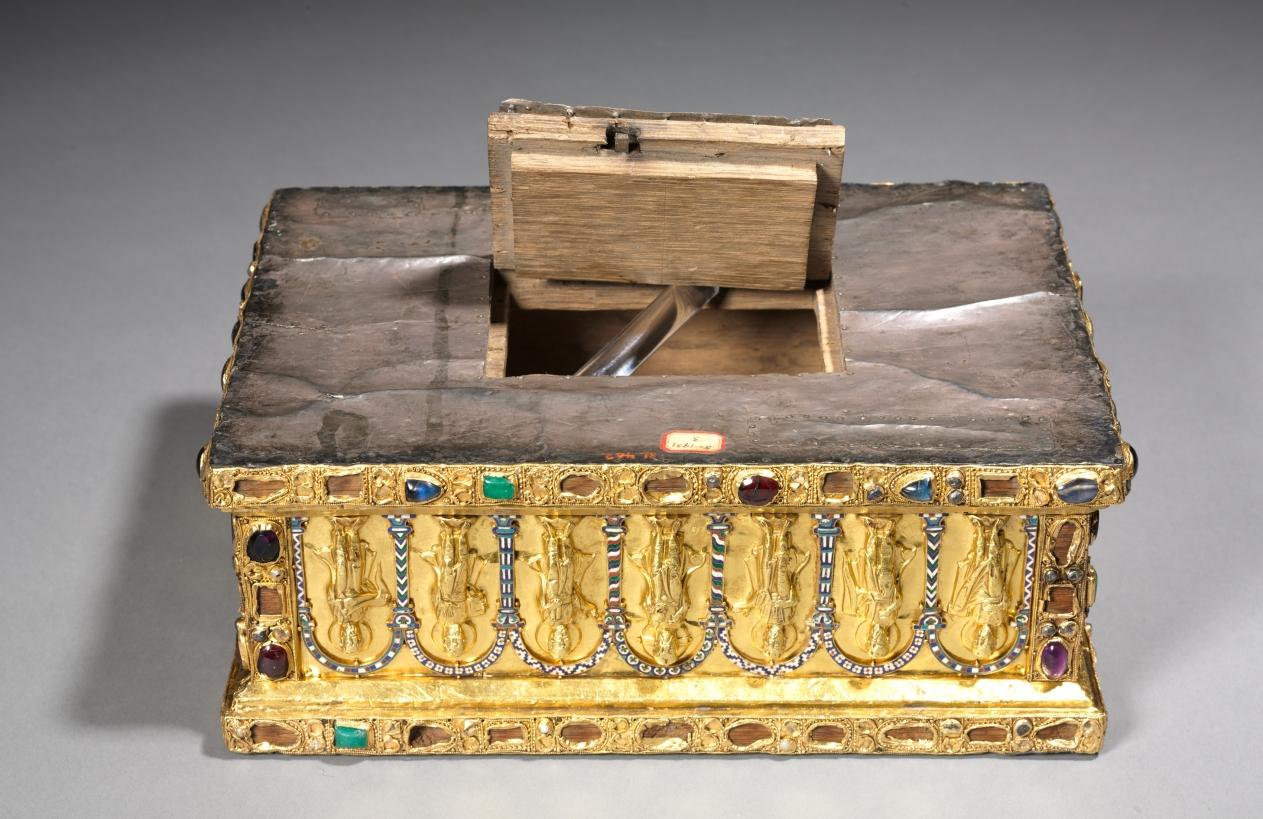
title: Portable Altar of Countess Gertrude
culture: Germany, Lower Saxony?, Romanesque period, 11th century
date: c. 1045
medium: gold, cloisonné enamel, porphyry, gems, pearls, niello, wood core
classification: Metalwork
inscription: GERDRVDIS XPO FELIX VT | VIVAT IN IPSO OBTVLIT HVNC LAPIDEM GEMMIS | AVROQ NITENTEM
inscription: SIGISMVNDVS, CONSTANTIVS, SANCTA CRVX, SCA ELENA, SCA ADALHEIT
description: Commissioned by Countess Gertrude of Brunswick, this portable altar is one of the Guelph Treasure’s earliest and most sumptuous objects. The choice of white-speckled porphyry as the altar stone signals Gertrude’s worldly aspirations; an imperial color since classical antiquity, porphyry was only used by the imperial family. Historical figures of royal and imperial rank are depicted with Christ, the Virgin, apostles, and archangels along the altar’s sides, stressing the countess’s political ambitions and claim of imperial lineage for her own dynasty. The Latin inscription surrounding the altar stone reads, "Gertrude offers to Christ, to live joyfully in him, this stone that glistens with gems and gold."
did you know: On the bottom of this altar is a trap door that opened to reveal small relics of saints wrapped in silk.